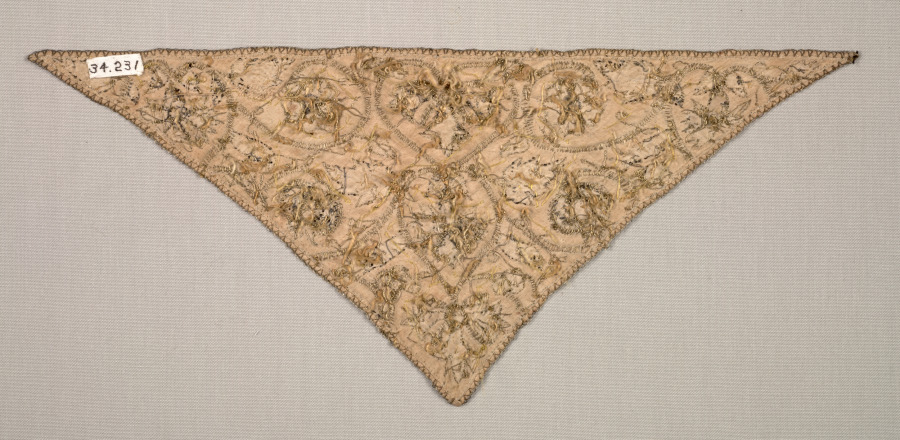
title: Forehead Cloth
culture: England, Elizabethan Period, late 16th century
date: late 1500s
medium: Silk, gold and silver thread, sequins, padding, linen; embroidery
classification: Embroidery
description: Sumptuous interlacing scrolls bearing flora and fruit embroidered with gold, silver, and silk thread decorate this set composed of a coif (cap see 1934.206) and forehead cloth (seen here). Individual motifs representing England appear within the scrolls, such as the Tudor rose, carnation, honeysuckle, and acorn. Fashionable ladies wore coifs in the house as semiformal dress and in bed for receiving guests. The large loops along its lower edge were drawn together to keep it in place. Worn pointing backward, the forehead cloth functioned like a visor, supposedly preventing wrinkles and keeping off the sun and cold air.